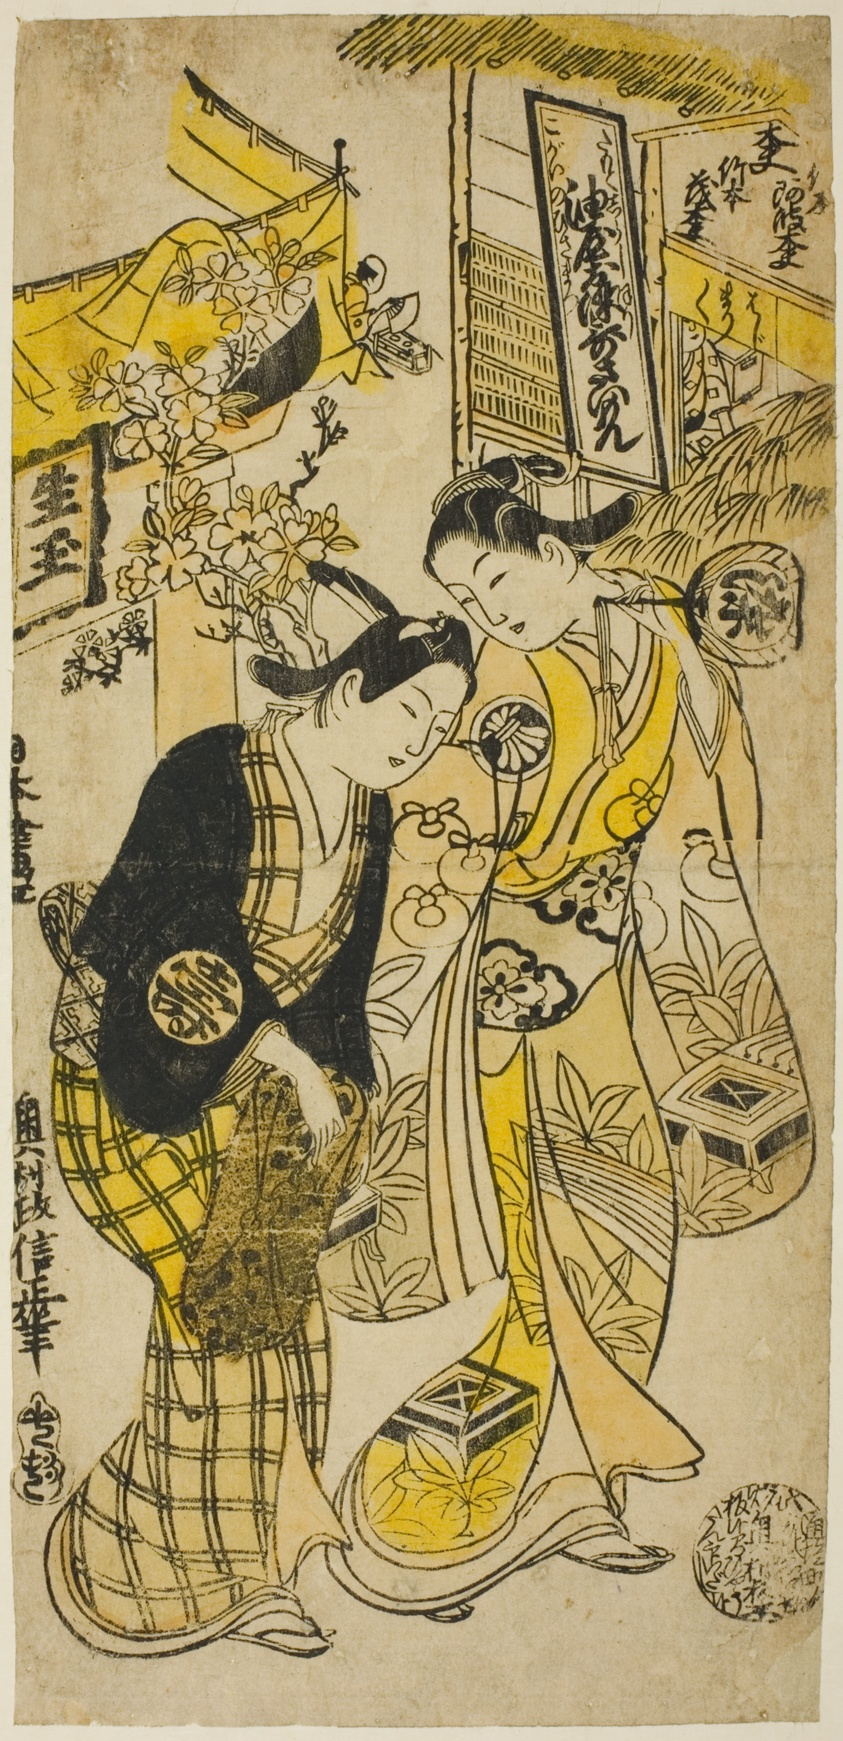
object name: Print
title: The Actors Segawa Kikunojo I as Osome and Sodesaki Kikutaro as Hisamatsu in the play "Osome Hisamatsu Shinju," performed at the Nakamura Theater in the sixth month, 1731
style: Japanese (culture or style)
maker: Okumura Masanobu (Japanese, 1686-1764)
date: 1731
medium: Hand-colored woodblock print; hosoban, urushi-e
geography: Japan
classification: woodblock print; print; asian art